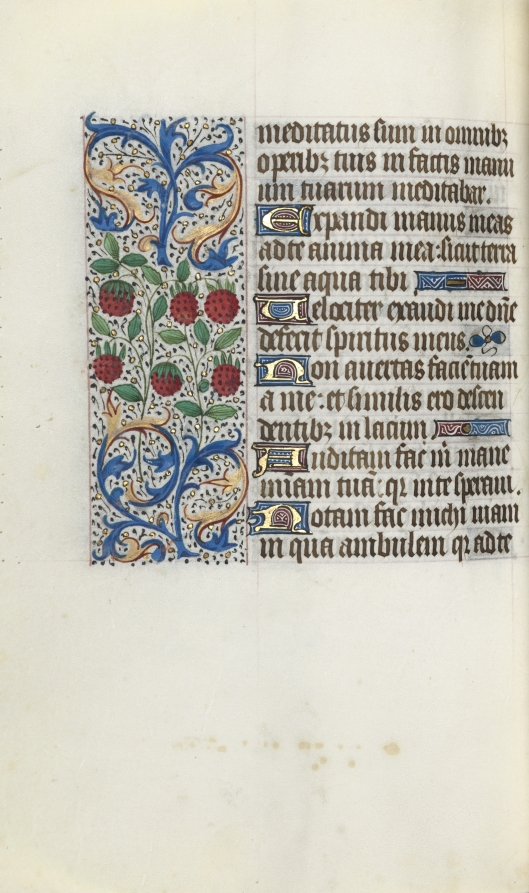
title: Book of Hours (Use of Rouen): fol. 91v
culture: France, Rouen, 15th century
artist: Master of the Geneva Latini (French, active Rouen, 1460–80)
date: c. 1470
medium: ink, tempera, and gold on vellum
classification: Bound Volume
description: In the late 1400s and early 1500s Rouen was an established and important center of book production. The city’s cathedral had a wealthy chapter that spent large sums of money to commission books and to maintain its extensive library. The stationers and booksellers would have likely been concentrated in or near the cathedral precinct. This artist, named after a manuscript now in Geneva, was Rouen’s principal illuminator during the second half of the 1400s.